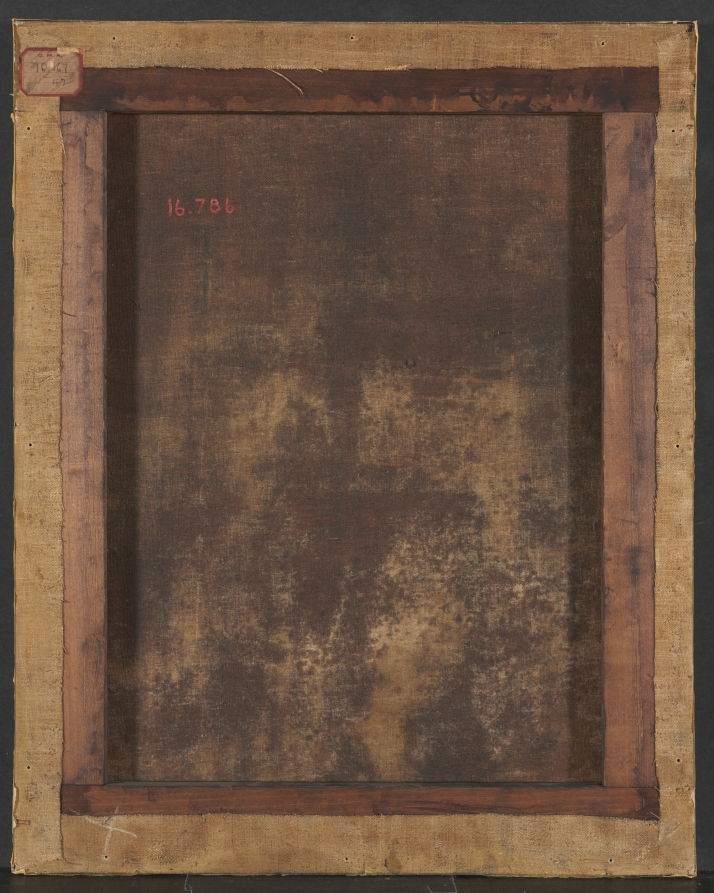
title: The Crucifixion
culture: Italy, 16th century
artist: follower of Sodoma (Italian, 1477–1549)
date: 16th century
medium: oil on canvas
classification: Painting